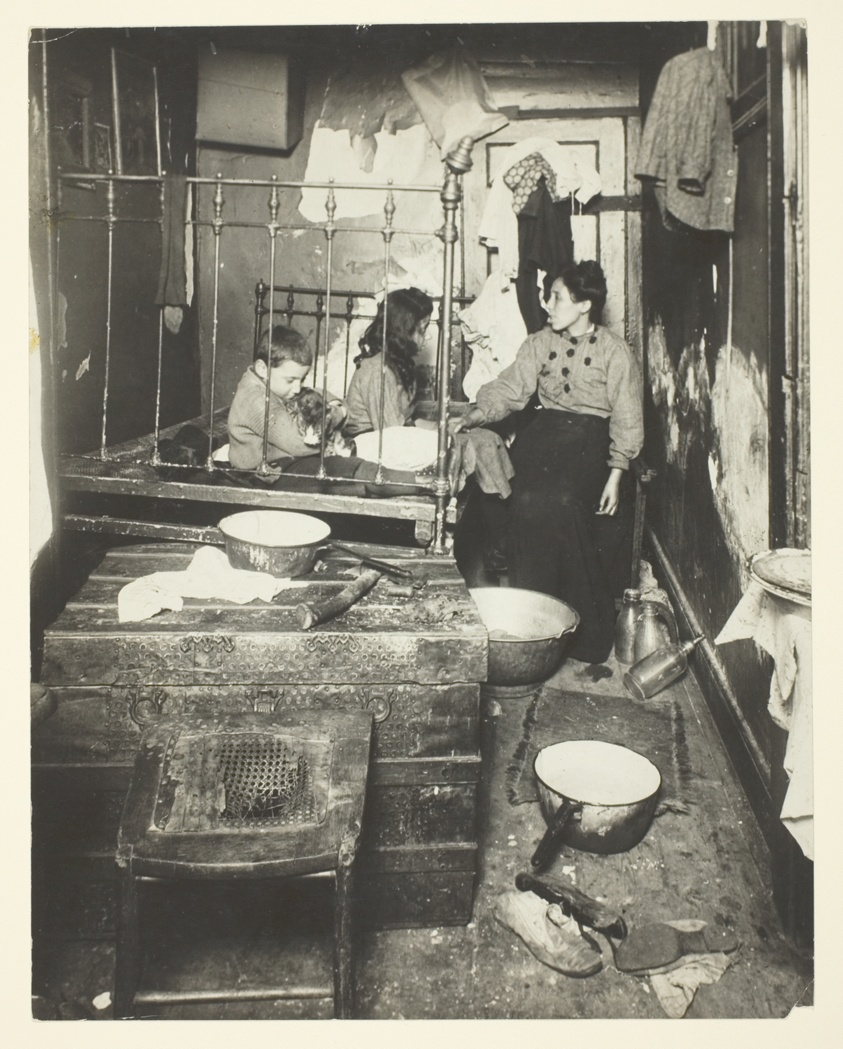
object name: Photograph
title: Tenement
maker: Lewis Wickes Hine (American, 1874–1940)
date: 1910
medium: Gelatin silver print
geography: United States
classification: gelatin silver (developing-out-paper) pr; photographic process; photography; photograph